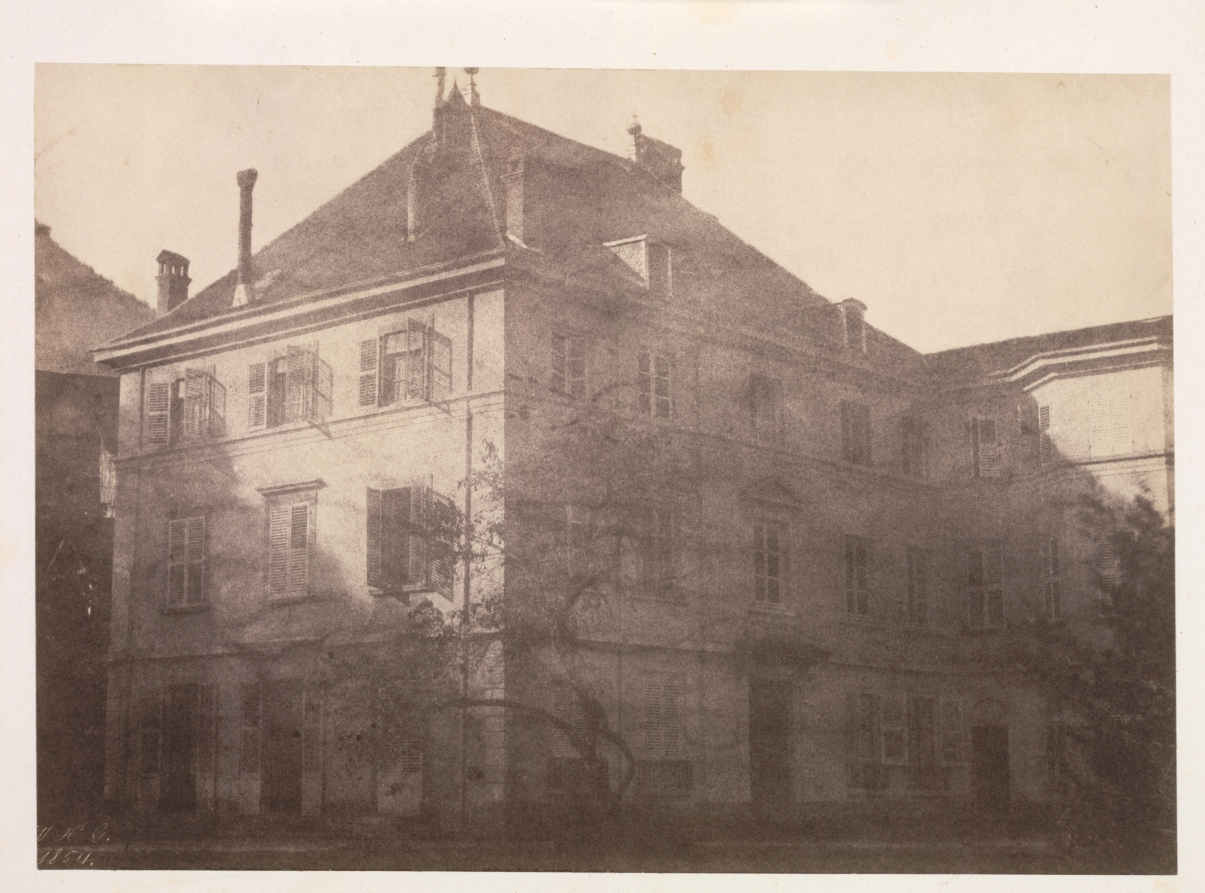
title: House in Pau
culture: France(?), 19th century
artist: W.H.G. (French)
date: 1854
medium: salted paper print from a paper negative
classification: Photograph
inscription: in negative, signed and dated: "WHG/ 1854"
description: This large, richly toned print is an exceptional example of the artistic and technical abilities of an early amateur photographer, possibly French in nationality, known only as W.H.G. In 1854 this mysterious photographer worked for a limited time in Pau and the surrounding regions of the Pyrenees. Most of his or her 24 known compositions are architectural details or buildings sited in the landscape. In this example, instead of a traditional frontal view, the massive shape of the stately townhouse was documented at an oblique angle, which accentuates its volume and emphasizes the negative space created by the steep roofline against the sky. Yet the photographer also captured delicate details, like the patterns of shadow cast by the open shutters against the building's walls. Clearly, W.H.G. understood the possibilities of the waxed paper negative, with its ability to render broad areas of light and shade, to suggest detail and texture, and to allow the viewer's imagination to complete the picture.